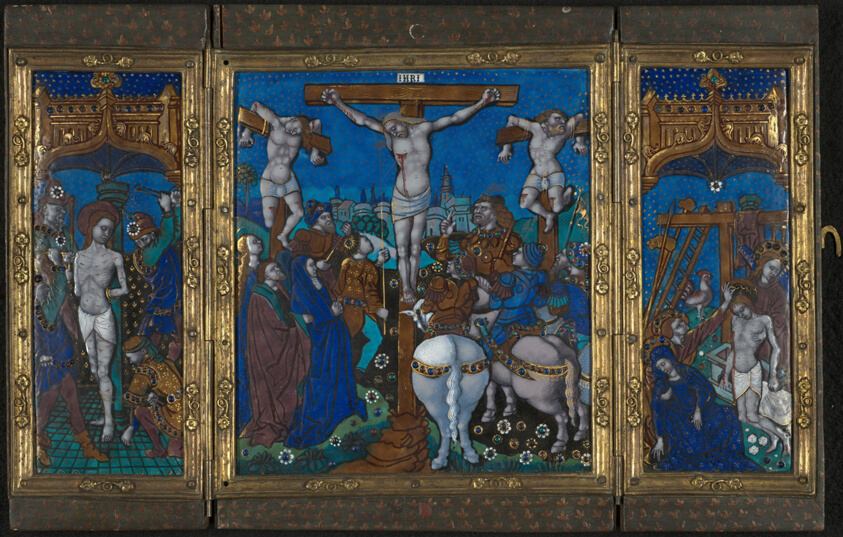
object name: Decorative Arts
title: Triptych with The Crucifixion, The Flagellation, and The Entombment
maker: French; Limoges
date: c. 1500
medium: Painted enamel and gold on copper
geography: Limoges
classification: enamel; european decorative arts; decorative arts